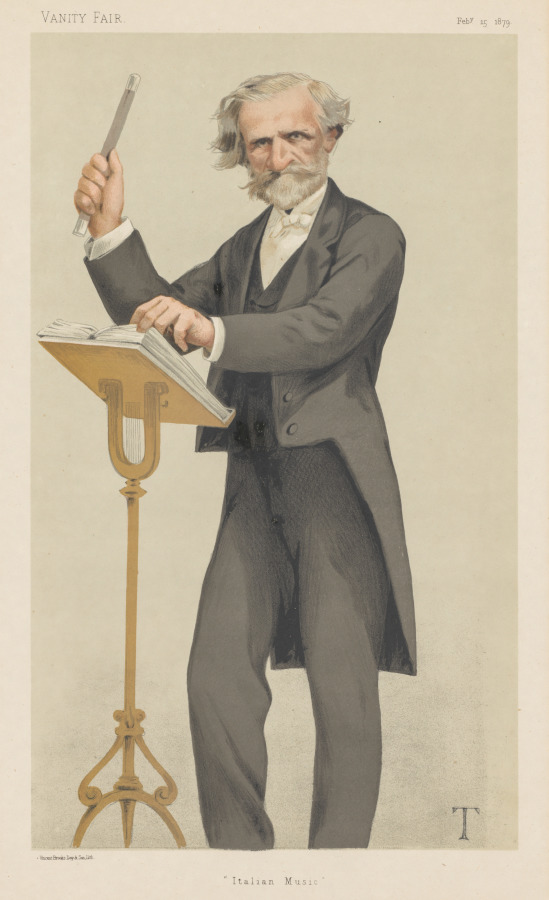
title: Vanity Fair: "Italian Music"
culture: France, 19th century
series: published in Vanity Fair Feb. 15, 1879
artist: Théobald Chartran (French, 1849–1907)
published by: Vincent Brooks Day & Son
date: 1879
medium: color lithograph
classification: Print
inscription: On mat, in graphite: VANITY FAIR SERIES 15 FEB 1879 GIUSEPPE VERDI; in graphite, verso: M of T Day # 193 / giuseppe Verdi